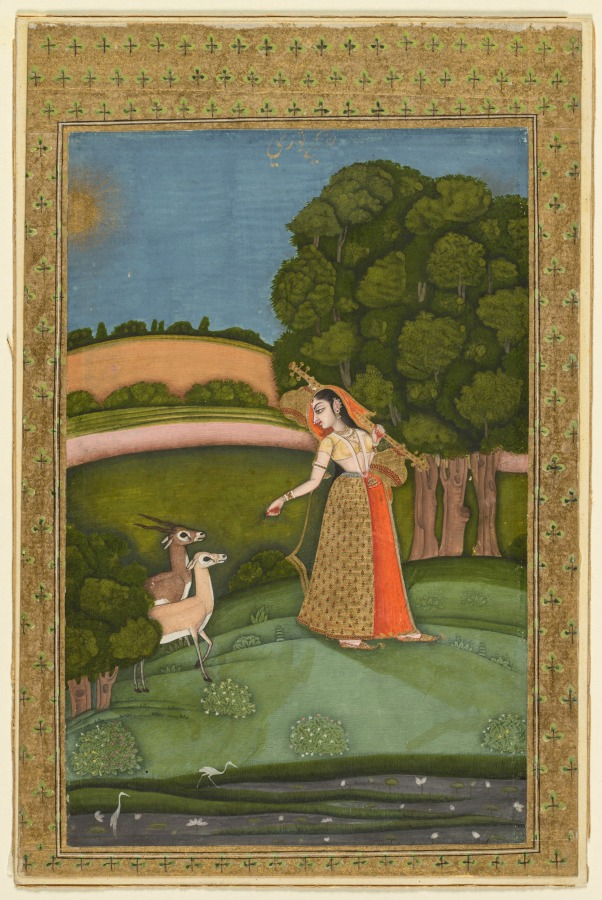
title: Todi Ragini, from a Ragamala Series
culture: Eastern India, Bengal, Murshidabad, 18th century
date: c. 1755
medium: Gum tempera and gold on paper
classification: Painting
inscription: identified at top in gold: ragini todi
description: Ragamala paintings were recognized as being associated with a season and time of day. Evoking a late morning in spring, here a young woman beguiles deer from the woodlands with her music to prevent them from destroying the crops in the field. The saturated hues and romantic idealization of the scene continue idioms begun in the Mughal court that were disseminated to regional centers of patronage such as Murshidabad. The inscription at the top of this page identifies the name, ragini todi, in Arabic script, which suggests that this ragamala series was made for a Muslim patron.